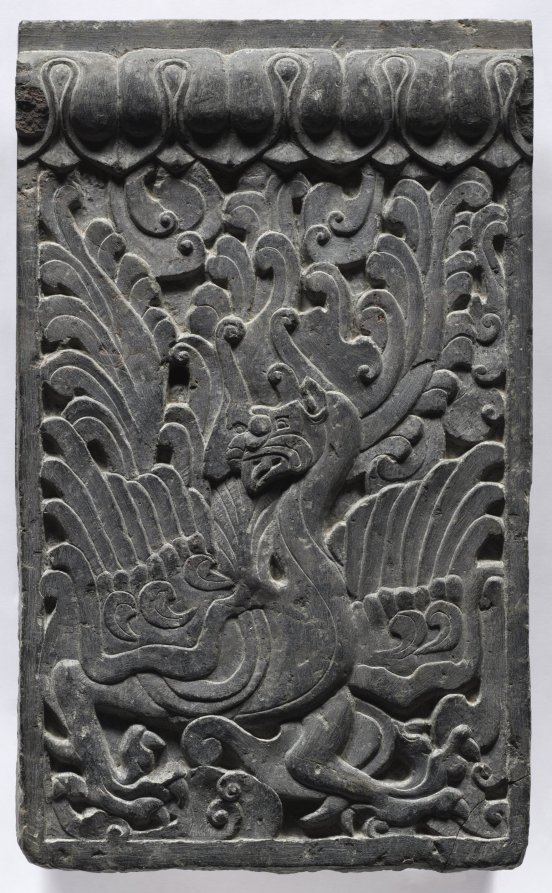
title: Section of a Coffin Platform: Phoenix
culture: China, Northern Qi dynasty (550-577)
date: 550–577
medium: limestone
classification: Sculpture